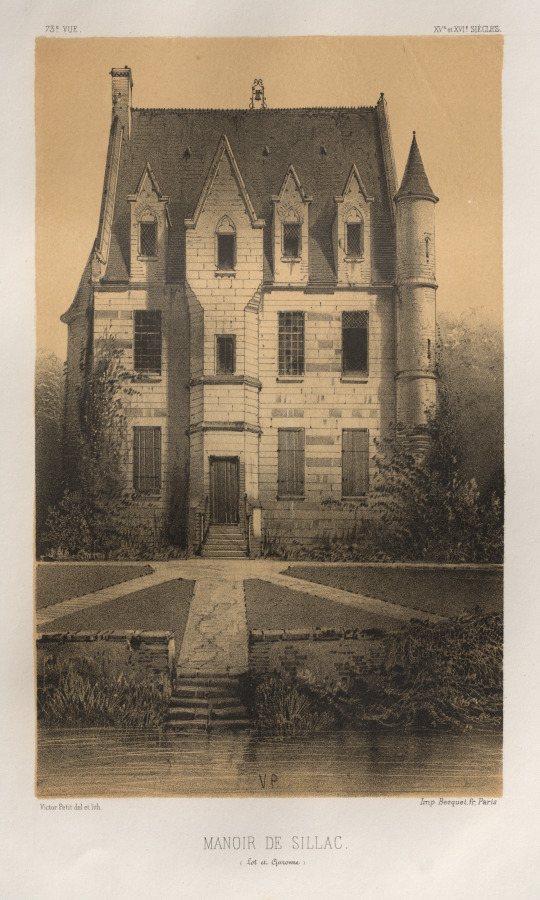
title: Architecture Pittoresque ou Monuments des XVeme. Et XVIeme. Siecles: Chateaux de France des XV et XVI Siecles: Pl. 73, Manoir De Sillac (Lot et Garonne)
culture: France, 19th century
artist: Victor Petit (French, 1817–1874)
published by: Charles Boivin (publisher and editor); Lith de Godard a Paris (printer)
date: 1860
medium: lithograph with tint stone, from portfolio of 100 lithographs with tint stone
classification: Print